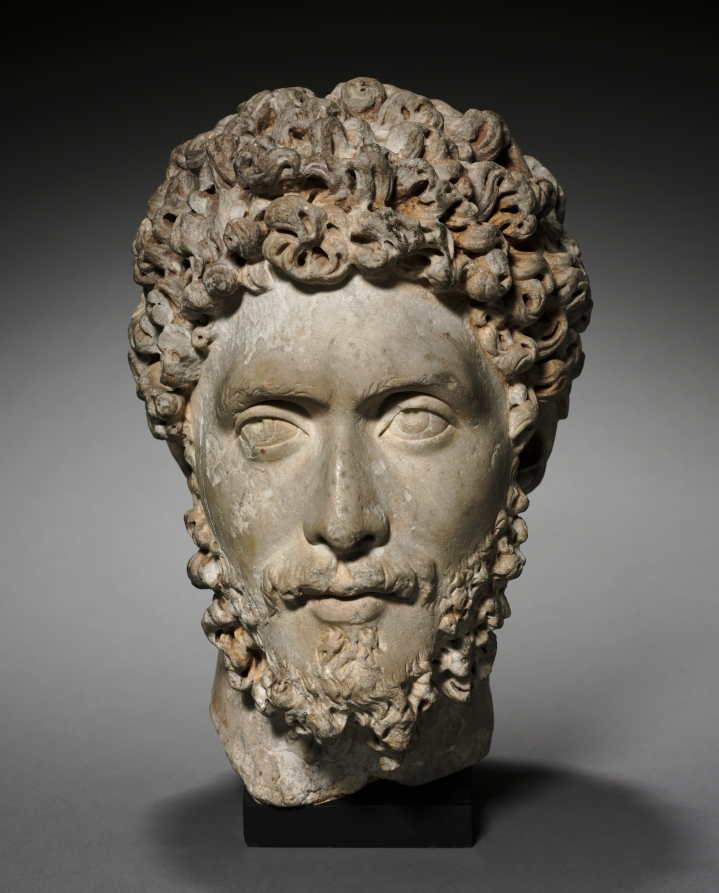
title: Portrait Head of a Noble or Official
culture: Italy, Roman, Antonine period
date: 175–200 CE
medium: marble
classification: Sculpture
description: A nobleman or government official is likely depicted in this portrait of a curly-haired man with a full beard. These features, together with drilled pupils and irises on the eyes, typically do not appear in Roman sculpture prior to the reign of Hadrian (AD 117–38), an admirer of Greek culture. Deeply carved beards and curls remain popular in portraiture throughout (and beyond) the Antonine period (AD 138–92), when this sculpture was probably made.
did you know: When acquired, this portrait was thought to depict Lucius Verus, co-emperor with Marcus Aurelius (reigned AD 161–69).